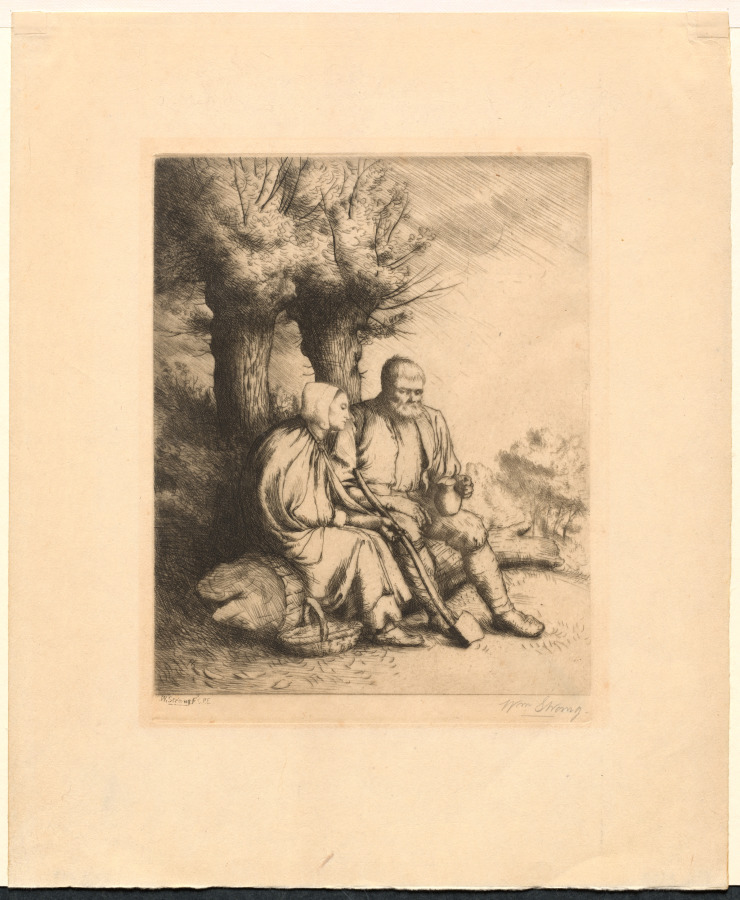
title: The Woodman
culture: Italy, 19th century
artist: William Strang (British, 1859–1921)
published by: Published in The Etcher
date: 1881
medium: etching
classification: Print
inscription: Lower right, in graphite: WM Strang.